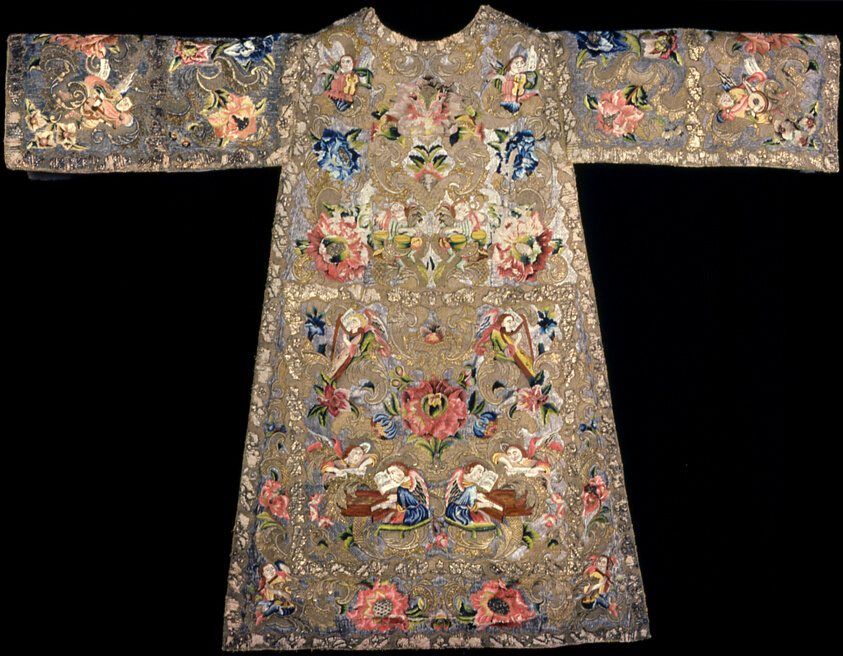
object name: Textile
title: Dalmatic and Humeral Veil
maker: Bavaria, Austria, Spain, or Mexico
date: 1675/1725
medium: Silk, plain weave; underlaid with linen, plain weave; embroidered with silk, gilt-metal strips and purl, and gilt- and silvered-metal-strip-wrapped silk in back, satin, split, and stem stitches; laid work, couching, padded couching, and French knots; gilt-metal spangles; edged with appliquéd linen, plain weave; embroidered with gilt-metal strips and gilt-metal-strip-wrapped silk in laid work, couching, and padded couching; lined with linen, plain weave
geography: Bavaria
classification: textile; needlework (visual works); liturgical; costume